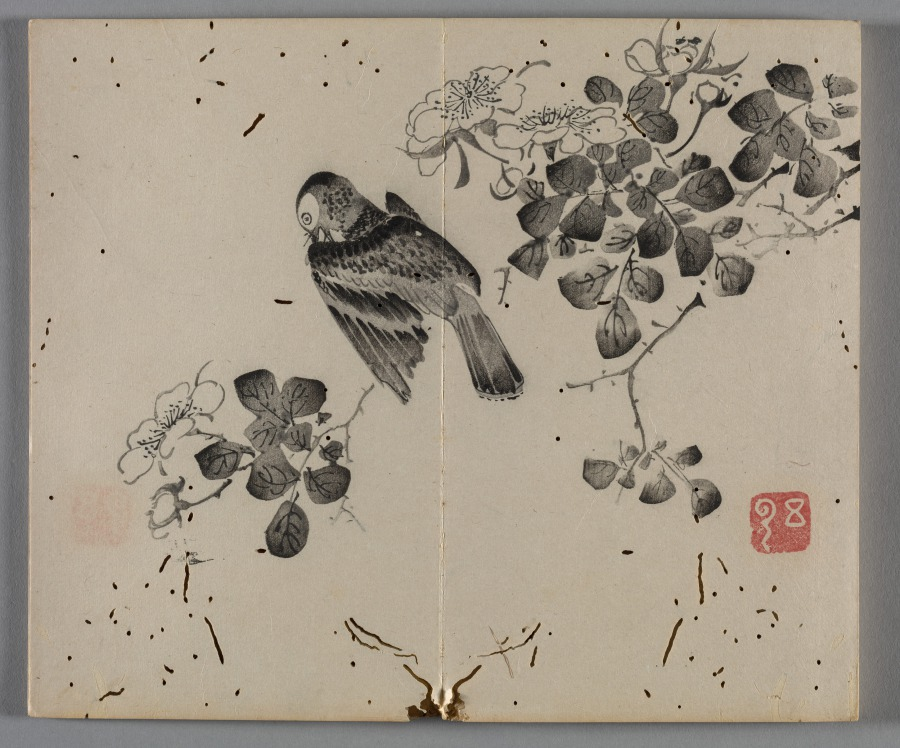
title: Ten Bamboo Studio Painting and Calligraphy Handbook (Shizhuzhai shuhua pu): Birds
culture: China, Qing dynasty (1644-1911)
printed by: Hu Zhengyan (Chinese, c. 1584–1674)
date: 1633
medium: Woodblock-printed book; ink and colors on paper; first edition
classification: Print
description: Color printing reached a level of perfection in the early 1600s, as seen in this Ten Bamboo Studio Collection of Calligraphy and Painting and the Mustard Seed Garden Manual of Painting (printed 1679 and 1701). The painterly quality, precision in registering (aligning) the woodblocks, and harmonious colors made them the most successful color print editions in Chinese history. Both editions were printed and compiled in Nanjing, spread nationwide, and had a great impact on the arts in Japan and Korea.